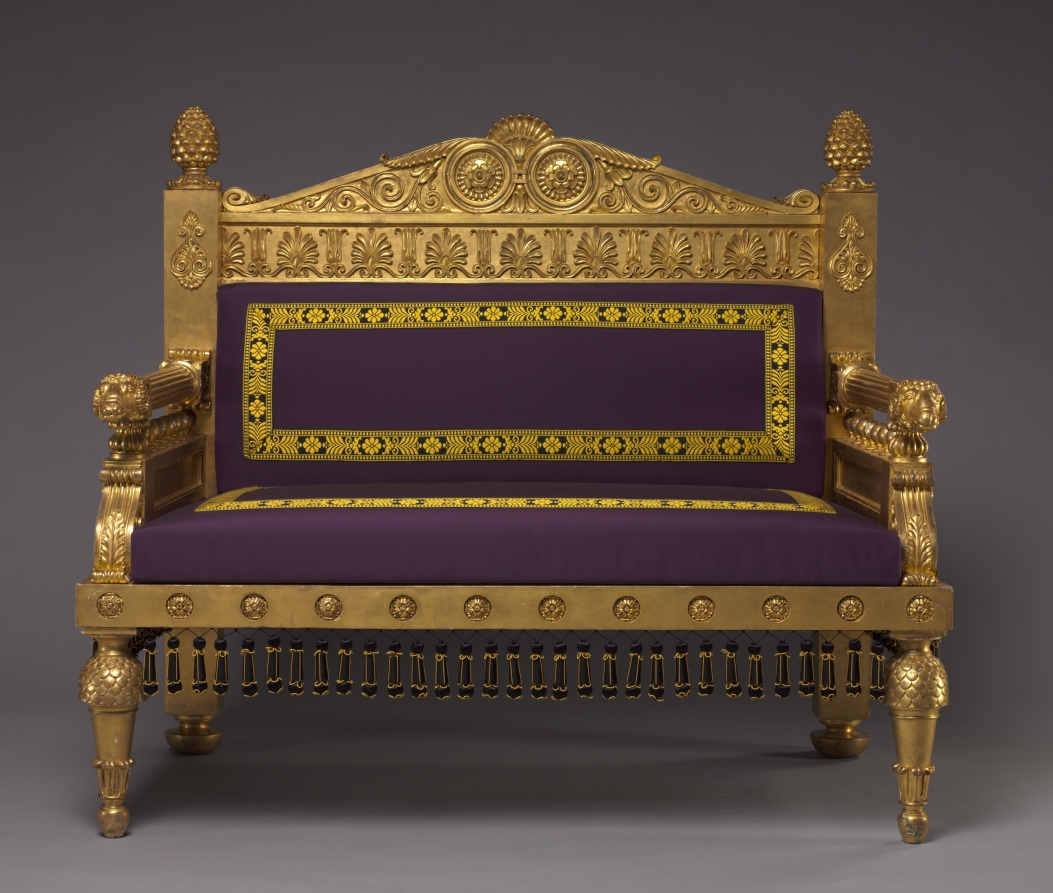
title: Settee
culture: England, 19th century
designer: Thomas Hope (British, 1769–1831)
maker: Unknown Maker (British)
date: c. 1802–07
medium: gilt-wood, reproduction wool upholstery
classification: Wood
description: An art collector, designer, and champion of neoclassicism, Thomas Hope designed this settee for display in his London house. Hope’s design exemplifies the continued interest in neoclassical ornament around 1800 through the use of elaborately carved friezes, a central pediment, and a lavishly gilded surface. In 1807 Hope published Household Furniture and Interior Decoration, featuring descriptions of his renowned collection of antiquities and the interior furnishings from his London house, including this settee. Many architects and cabinetmaking firms took inspiration from Hope’s designs, adapting Greek and Roman forms to create bold expressions of neoclassicism in their architecture and decoration.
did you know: The acorn finials, ram’s heads, and clusters of stylized honeysuckle flowers along the settee’s frame are typical of Thomas Hope’s neoclassical designs.